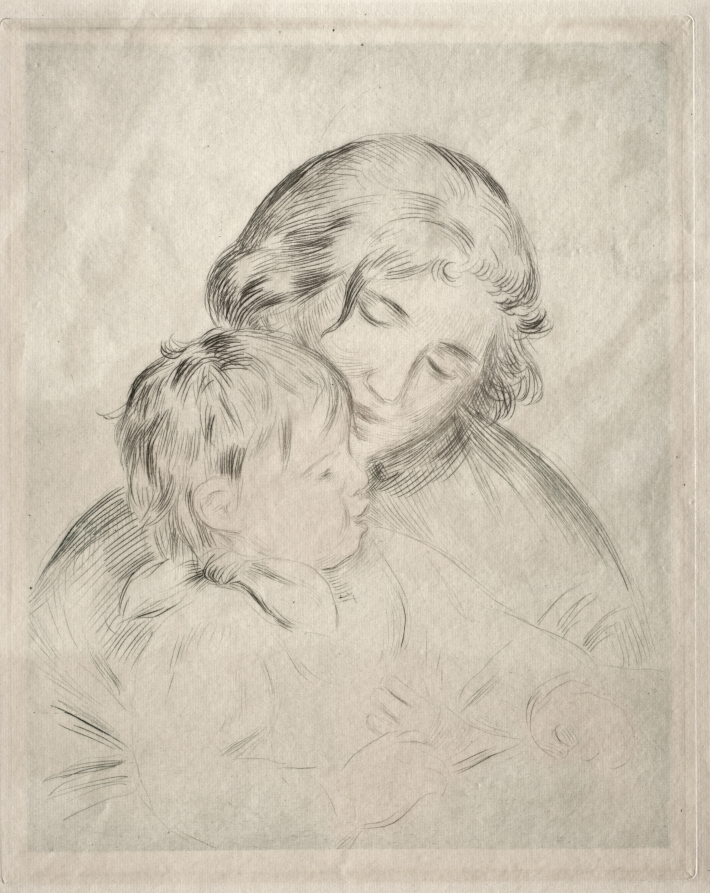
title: Mother and Child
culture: France, 19th century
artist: Pierre-Auguste Renoir (French, 1841–1919)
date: 1896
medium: etching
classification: Print